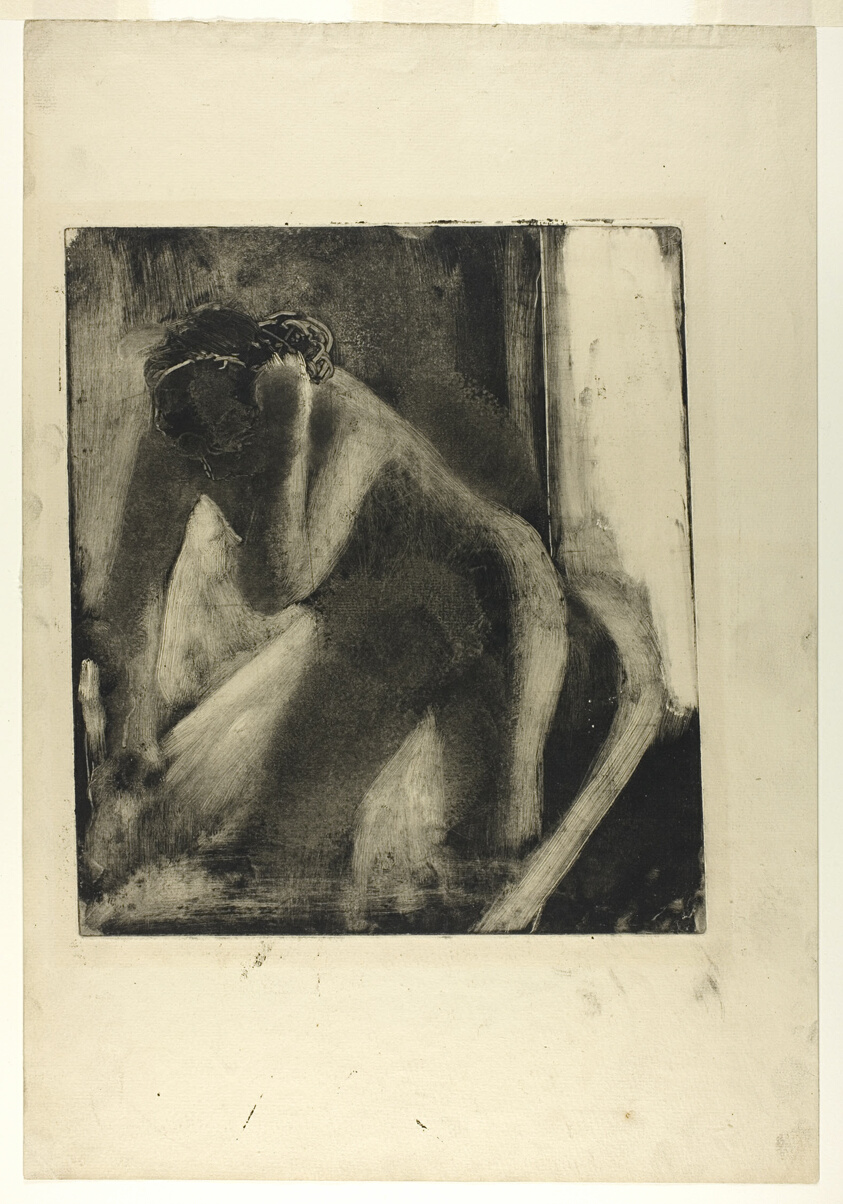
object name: Print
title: The Bath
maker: Edgar Degas; French, 1834-1917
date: c. 1882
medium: Monotype in black ink on cream laid paper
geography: France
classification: monotype; print; prints and drawing; paper